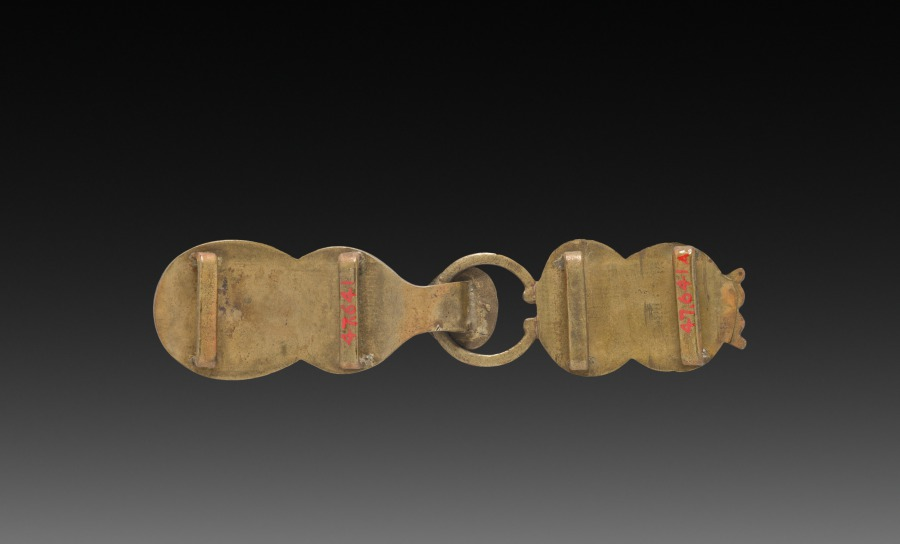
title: Buckle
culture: China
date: 1900s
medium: bronze, engraved and set with carnelian and jade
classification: Jewelry